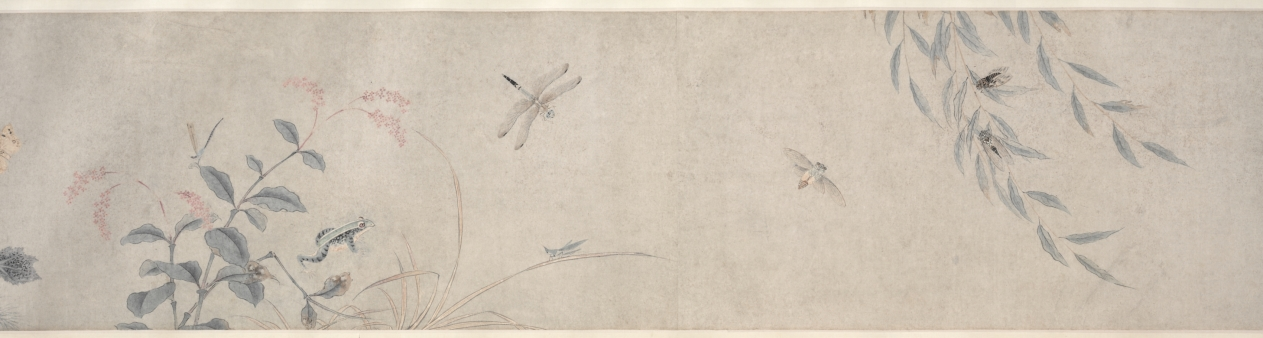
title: Insects and Flowers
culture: China, Qing dynasty (1644-1911) or Republican period (1912-49)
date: c. 1900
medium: Handscroll, ink and color on paper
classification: Painting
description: More than 26 feet long, this scroll presents insects, reptiles, and plants in delicate brushwork and pale colors, referring in style to earlier Southern Song dynasty (1127–1279) bird-and-flower paintings. Upon closer inspection, ants dismember a butterfly and reptiles wait to ambush their prey. An inscription at the end of the painting gives us an idea of its meaning: Attributed to the Qing dynasty scholar Zhang Xigeng (張錫庚, 1801–1861), the inscriber relates the work to an earlier painting by Qian Xuan (錢選, c. 1235–before 1307) and further suggests that the painting may allude to the relentlessness of natural selection. By drawing a parallel to tumultuous episodes in Chinese history, the writer might even hint at the domestic rebellions and the aggression of Western powers against China in his lifetime, particularly the Opium Wars (1839–60).